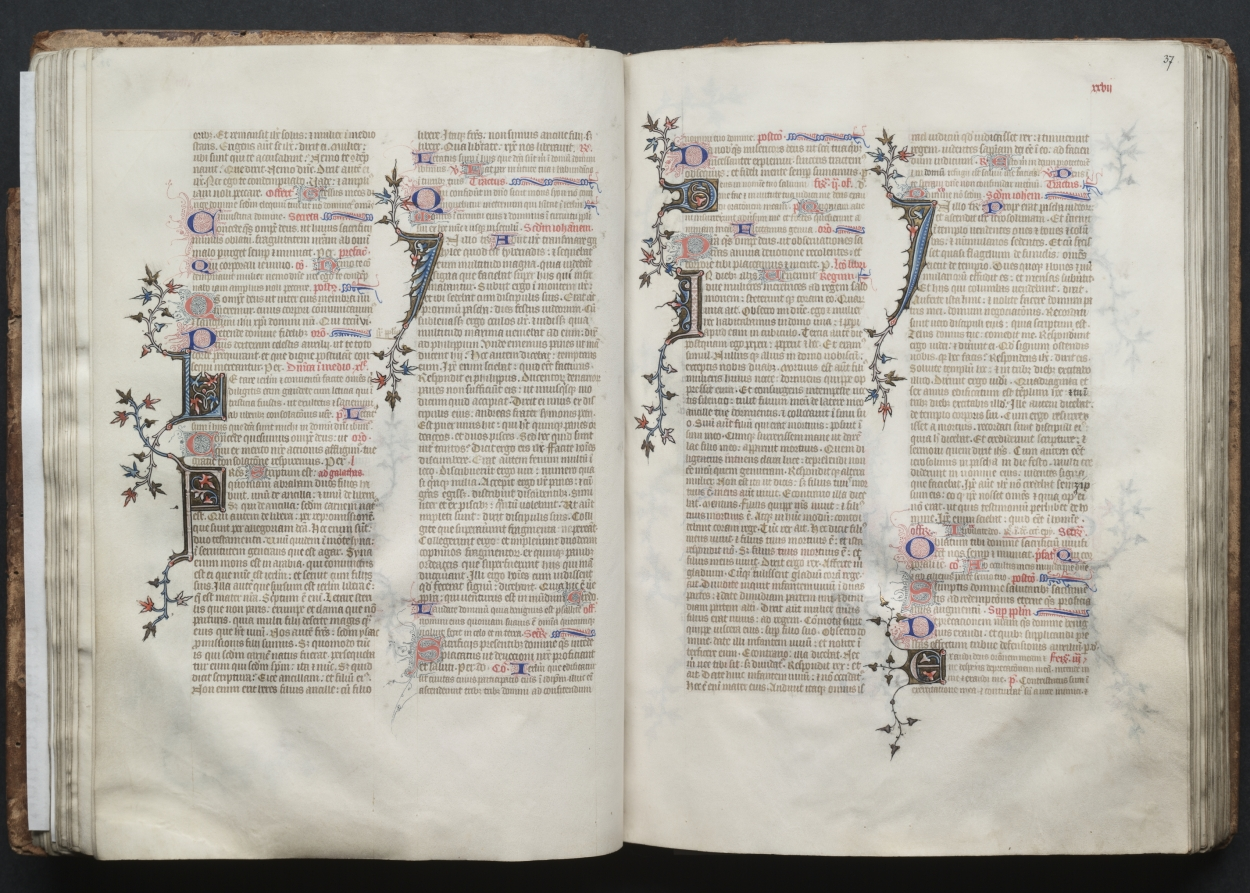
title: The Gotha Missal: Fol. 36v, Text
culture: France, Paris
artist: Master of the Boqueteaux (French)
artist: and Workshop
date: c. 1375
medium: ink, tempera, and gold on vellum; blind-tooled leather binding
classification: Bound Volume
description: The style and quality of this manuscript's decoration is typical of deluxe Parisian books made for aristocratic or royal patrons. Most of the book's decoration appears to be the work of the Master of the Boqueteaux, an artist active at the court of King Charles V (died 1380). His style was apparently shared by a number of book illuminators working in and around Paris. It is very possible that the Gotha Missal belonged to Charles V, but is not provable because the manuscript has no royal portraits and lacks a colophon. Given the book's magnificent decoration, however, it would seem that it was produced for a Valois prince, if not for the king himself. The manuscript receives its name from the German dukes of Gotha, its later owners.